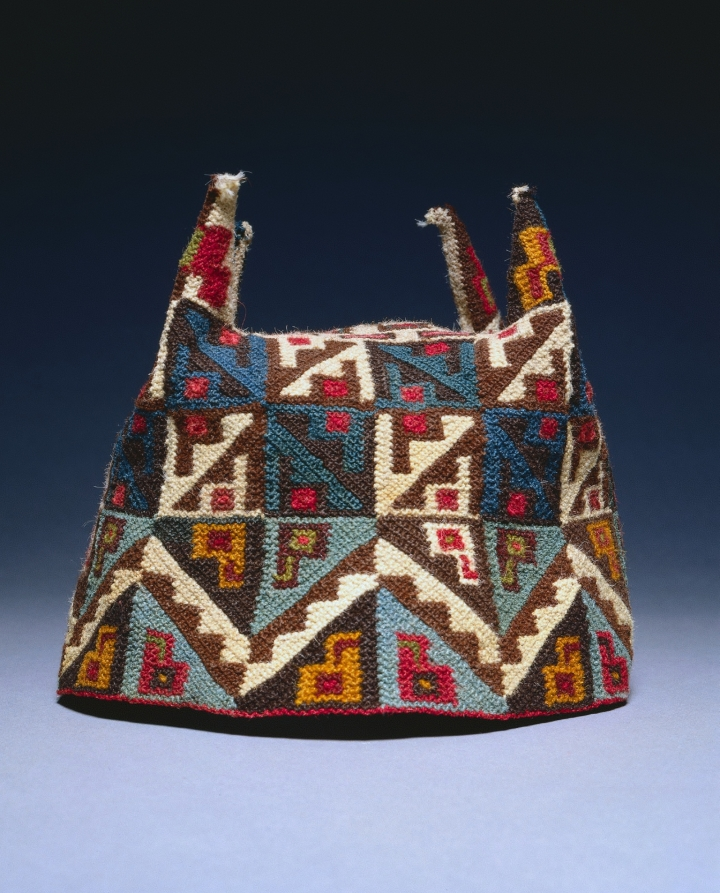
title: Four-Cornered Hat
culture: Peru, South Andes or Chile, Northern Andes, Tiwanaku style, 5th-10th Century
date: c. 400–1000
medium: alpaca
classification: Textile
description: A distinctive type of Tiwanaku and Wari headgear was a hat with four ear-like peaks rising from the corners. Depicted on warriors and other men who wear prestigious clothing and ornaments, the hats were made with knots, visible on all sides of this handsome Tiwanaku example. The hat is decorated with a pattern that includes a profile bird head.